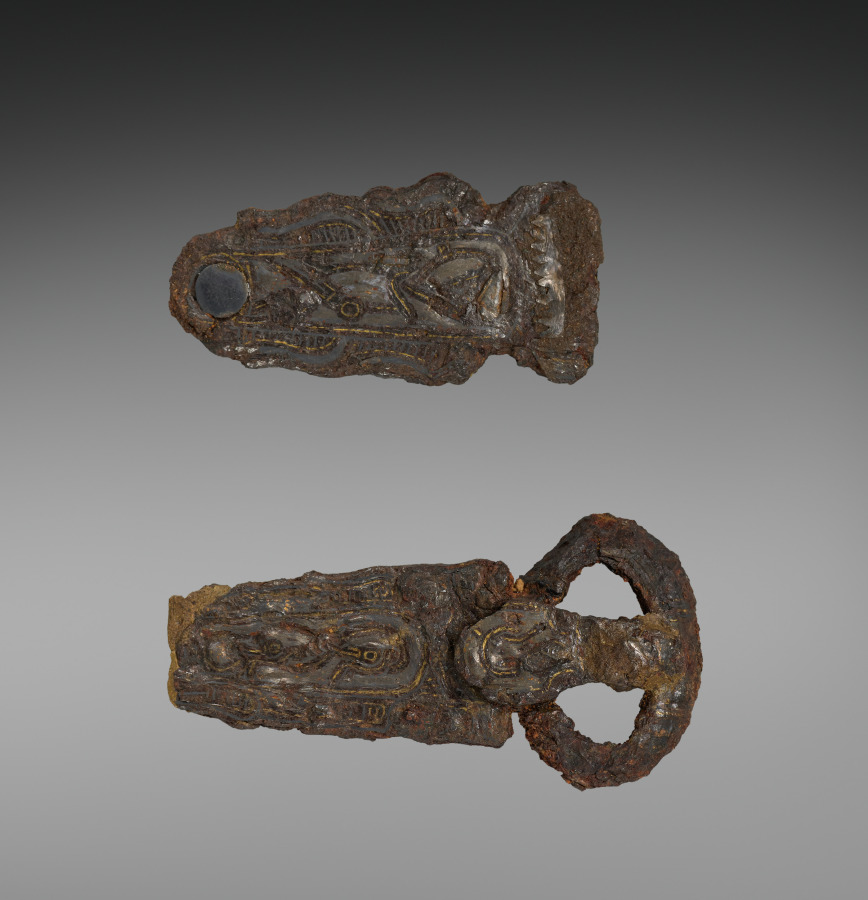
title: Buckle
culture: Merovingian, Burgundian, Migration period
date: 600s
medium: iron with silver overlay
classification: Jewelry